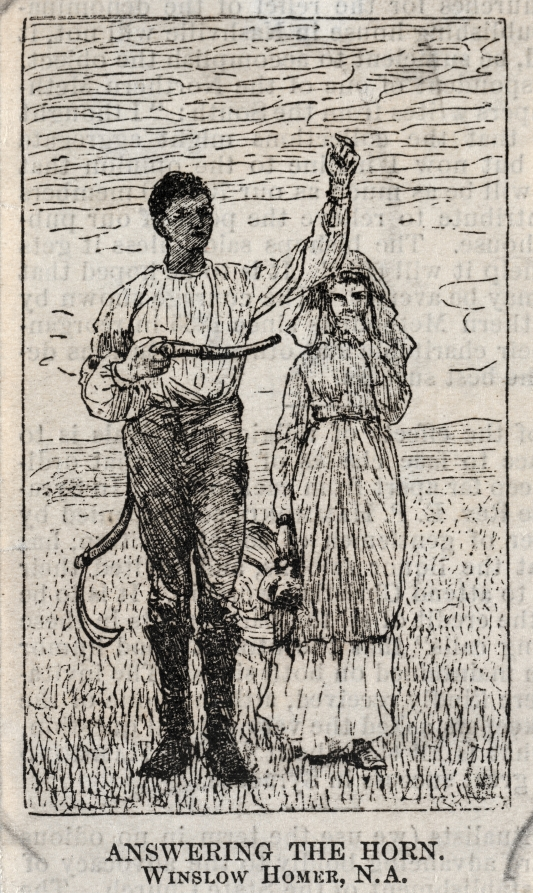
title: Answering the Horn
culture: America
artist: Winslow Homer (American, 1836–1910)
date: c. 1870s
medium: wood engraving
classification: Print